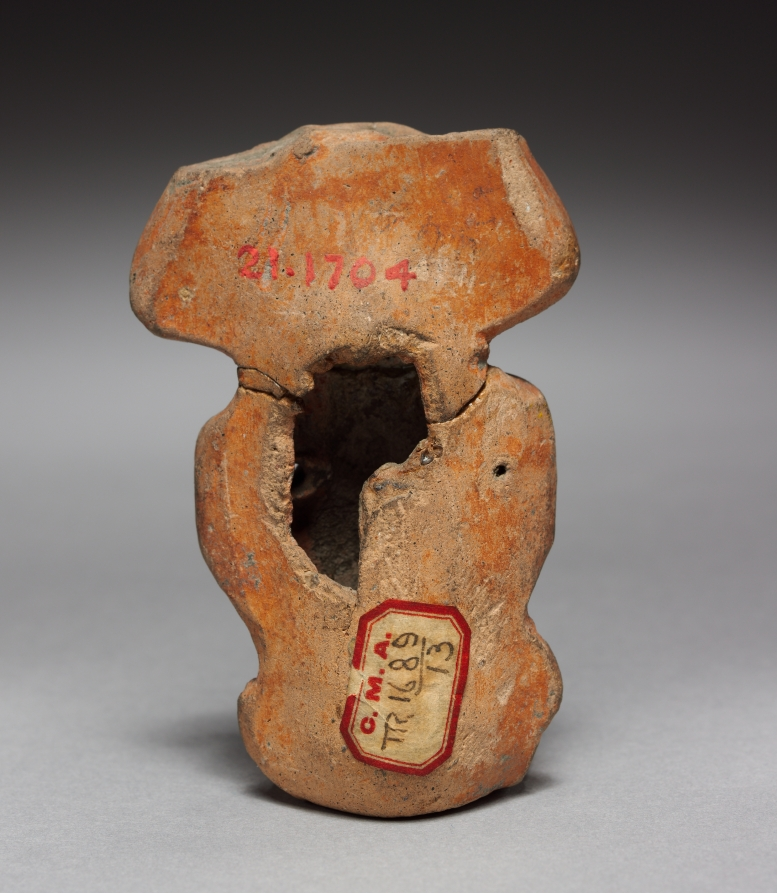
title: Figurine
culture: Mexico, Aztec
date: 1325–1521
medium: pottery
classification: Ceramic